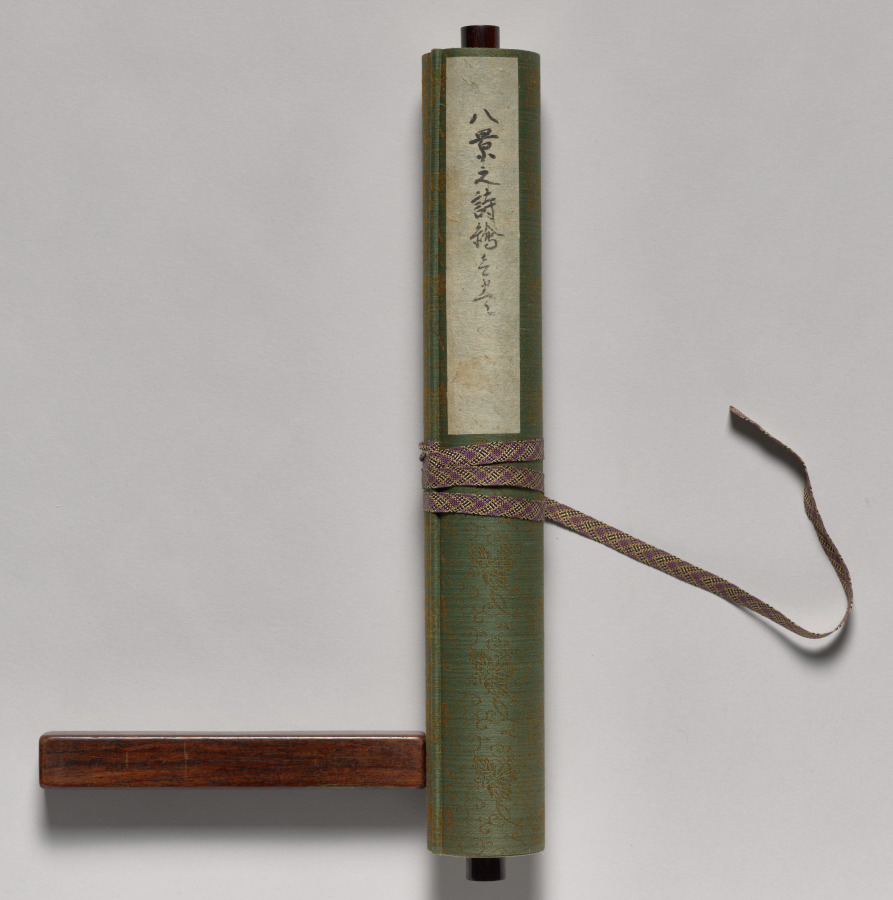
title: Poems and Pictures of the Eight Views of Xiao-Xiang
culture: Japan, Momoyama period (1573–1615)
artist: Unkoku Tōgan (Japanese, 1547–1618)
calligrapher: Inkei Gentetsu (Japanese, 1562–1612)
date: 1605–12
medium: Handscroll; ink on paper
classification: Painting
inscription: Each painting sealed with red gourd-shaped seal reading Unkoku (雲谷) and a square seal reading Tōgan (等顔).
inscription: Each painting prefaced with a titled poem on the Eight Views of Xiao-Xiang by Yujian Ruofen (active late 13th century) inscribed by Japanese Buddhist monk Inkei Gentetsu (1562–1612).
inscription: 右寫玉㵎之筆勢／雪舟末葉等顔筆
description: Unkoku Tōgan brushed these scenes using the splashed-ink technique associated in Japan with the Chinese monk Yujian Ruofen (active late 1200s). Xiao-Xiang refers to the region in present-day Hunan province, where the Xiang River and its tributaries converge. Each of the eight views evokes a time of day or season. The earliest surviving series of Xiao-Xiang paintings is by Wang Hong (active mid-1100s), but textual evidence tells us the theme appears earlier. It was later adopted in Japan and Korea, as seen here. The poems were inscribed by Inkei Gentetsu, the third abbot of the Rinzai Zen temple Tōshunji, Japan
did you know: The “Tō” of Tōgan comes from the name of painter Sesshū Tōyō (1420–1506).